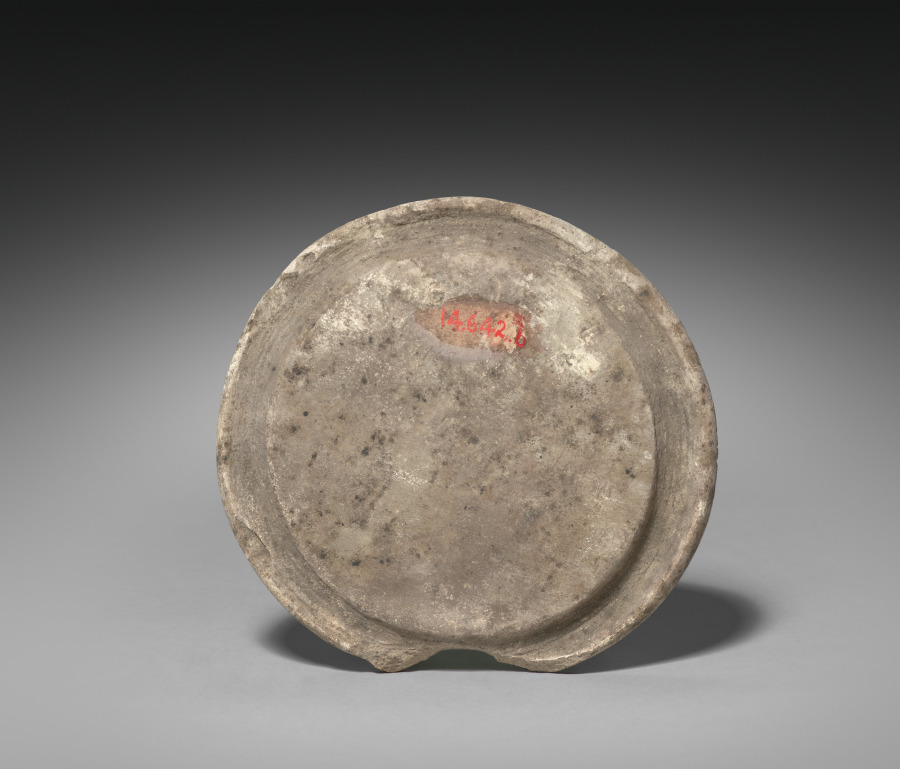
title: Shawabty Jar with Lid (lid)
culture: Egypt, New Kingdom (1540–1069 BCE), Dynasties 19–20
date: 1295–1069 BCE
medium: Nile silt ware; lid of limestone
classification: Funerary Equipment